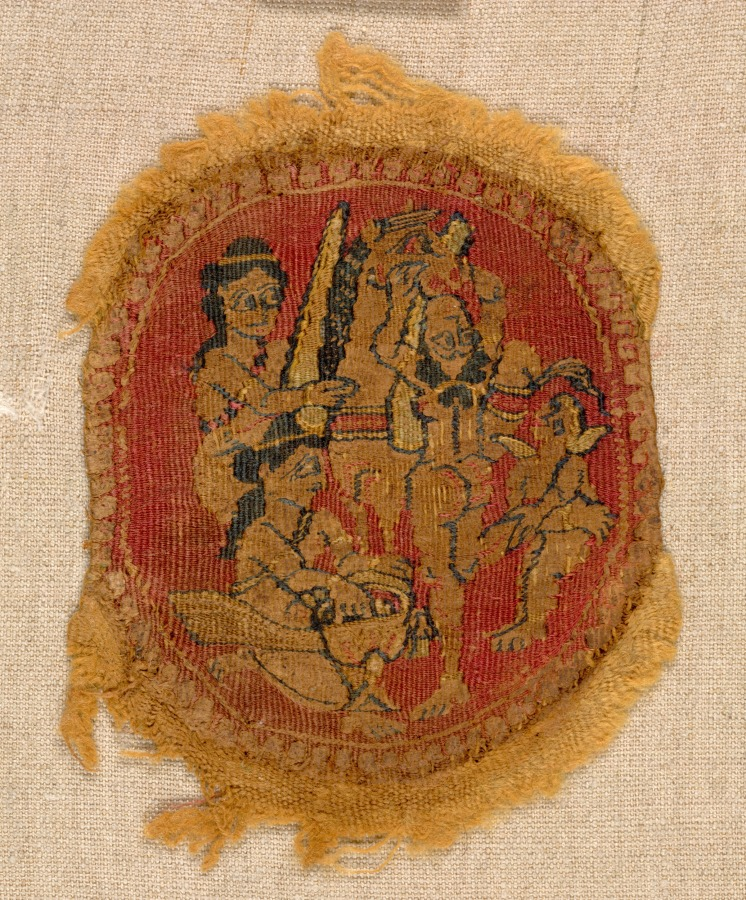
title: Five Round Segmenta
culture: Egypt, Umayyad period (661–750)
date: 650 – 750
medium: tapestry weave: wool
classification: Textile